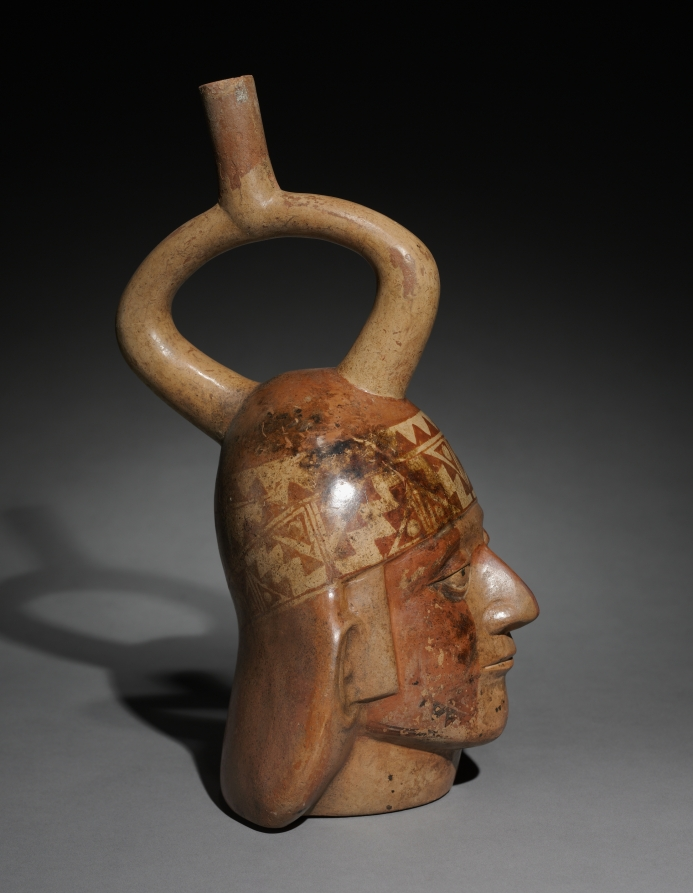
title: Portrait Head Vessel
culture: Peru, North Coast, Moche style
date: c. 200–550 CE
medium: earthenware with colored slips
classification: Sculpture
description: The Moche were unique in ancient Peru in creating realistic human portraits, usually in the form of ceramic vessels. In general, such vessels represent more than 750 individuals; identities are unclear but most are elite men, some probably rulers. The stirrup-shaped spout is a hallmark of Moche ceramic production.